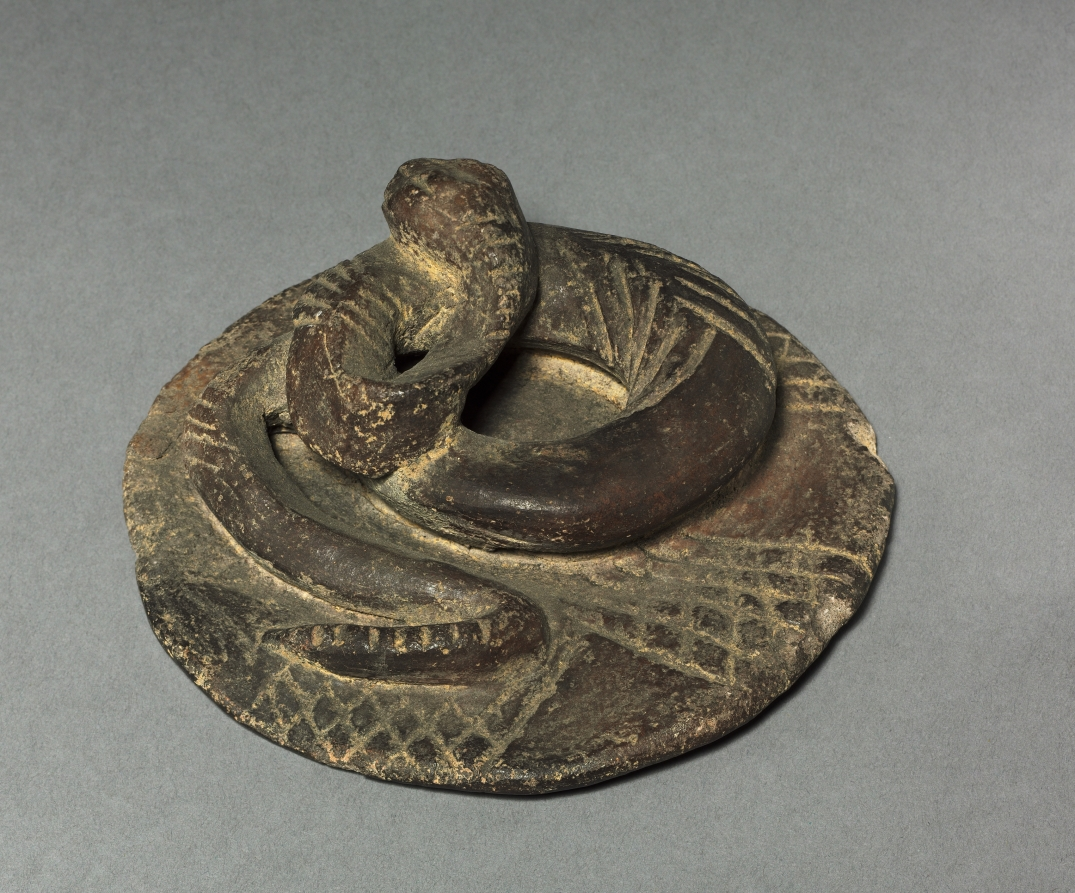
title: Weight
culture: Colombia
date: before 1921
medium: pottery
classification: Ceramic